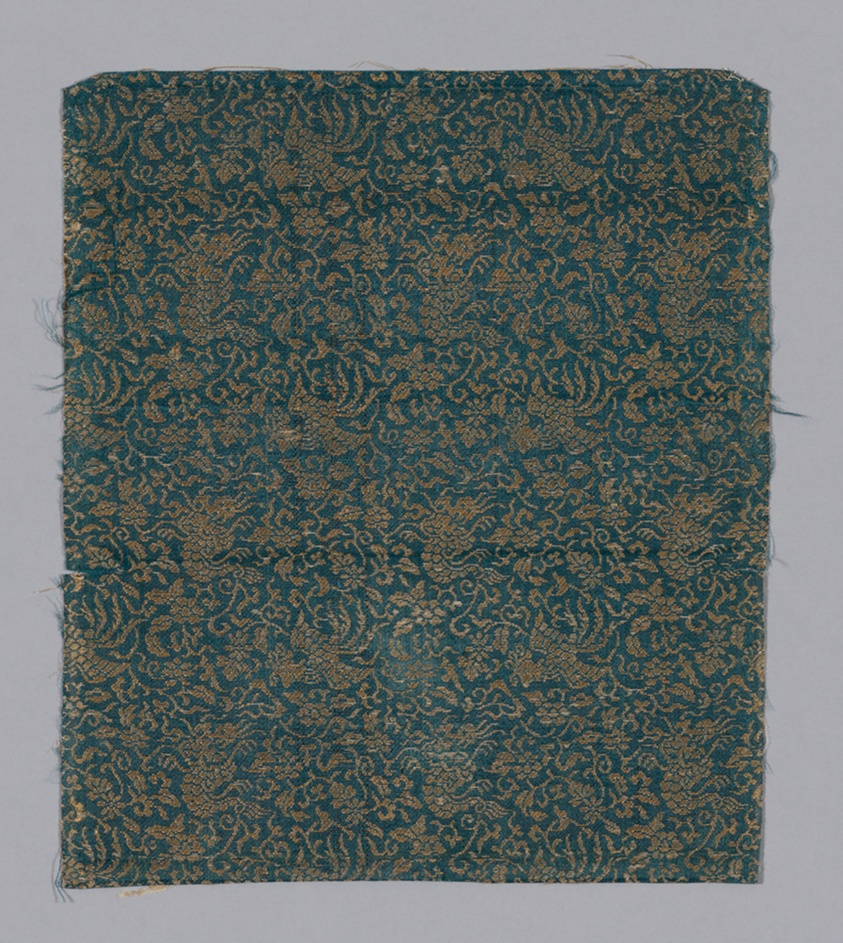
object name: Textile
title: Fragment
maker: Japan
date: late Edo period (1789–1868)/ Meiji period (1868–1912), 19th century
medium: Plain compound twill, silk & gilt paper; 3 strips to m.m.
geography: Japan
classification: weaving; textile